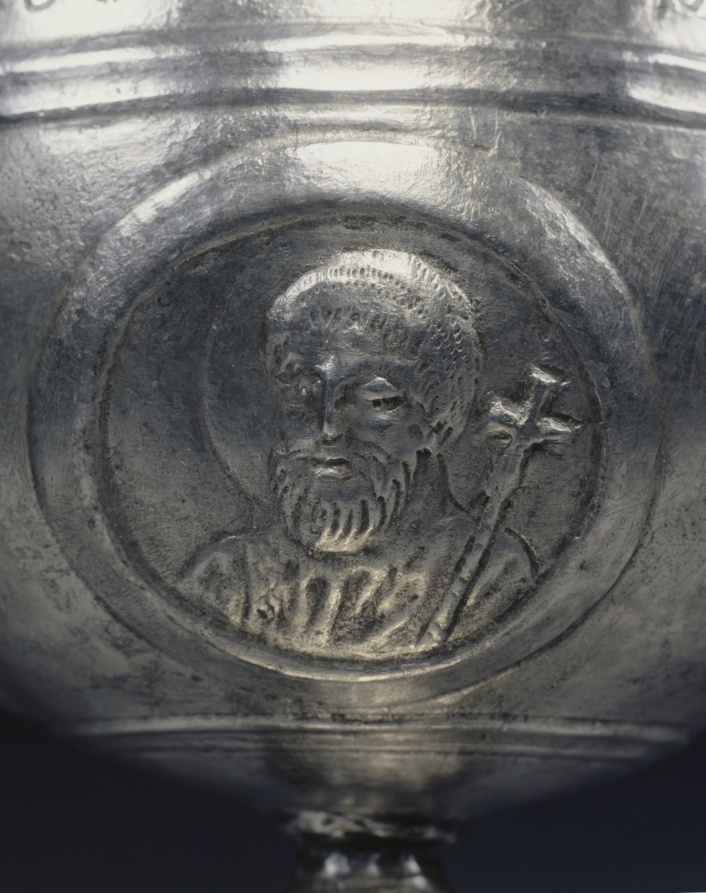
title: Chalice from the Beth Misona Treasure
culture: early Byzantium, Constantinople or Syria, Byzantine period, 6th-7th Century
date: c. 500–700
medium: silver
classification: Metalwork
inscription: the Greek inscription at the top, under an engraved line translates as: + The priest, KYRIAKOS, son of DOMNOS, (gave this chalice) to St. Sergios, in the time of Zeno the priest.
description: These four liturgical silver vessels—a paten and three chalices (1950.378–81)—form what is now called the Beth Misona Treasure, named for the village in northern Syria for which the objects were made. While nothing is known about the exact location and circumstances of the treasure's discovery, the people of the village of Beth Misona were, like other Christian communities in Syria and Palestine, probably forced to bury their church silver to hide it from the Persians or Arabs, who conquered their lands in the first half of the 600s. The paten, which held pieces of Eucharistic bread used during Mass, is decorated with an engraved Latin cross surrounded by a dedicatory inscription that names the paten's donor—Domnos—and its original location, the church of Saint Sergios in Beth Misona. The chalices, which contained the Eucharistic wine used during Mass, feature broad cups decorated with portrait busts of Saints Peter and Paul, Christ, and the Virgin. One chalice bears a dedicatory inscription naming its donor—Kyriakos, Domnos's son—and the priest of the church that received the pious gift—Zeno.